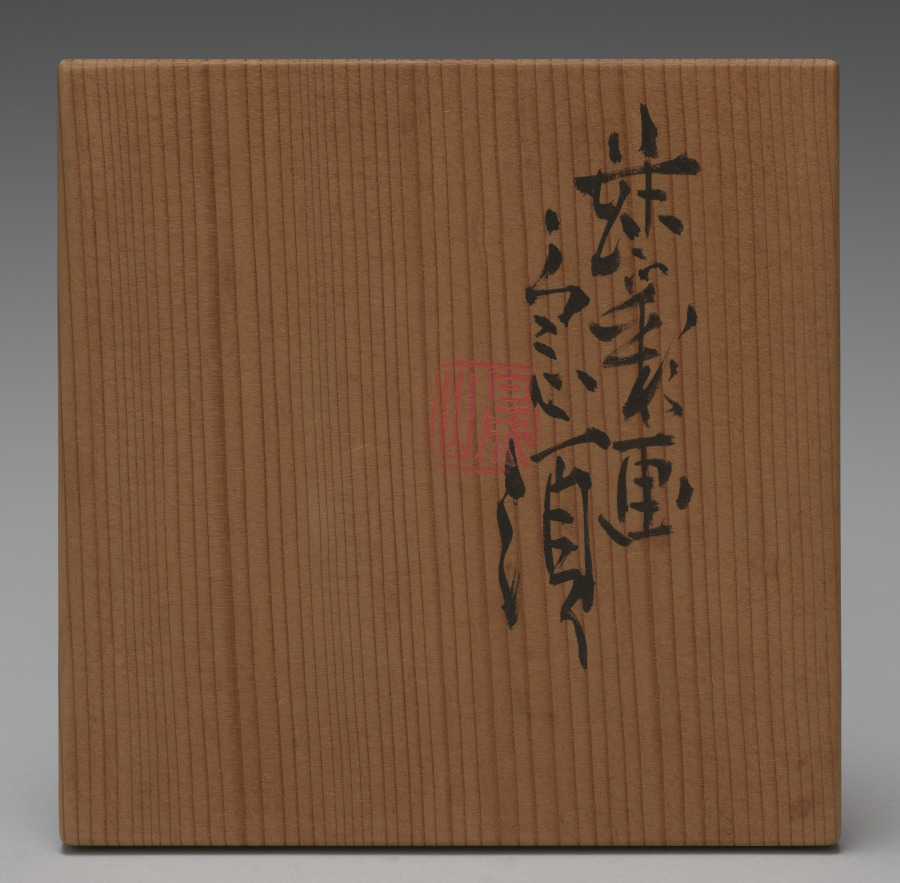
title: Teapot with Chrysanthemums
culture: Japan, Meiji period (1868–1912)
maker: Seifū Yohei III (Japanese, 1851–1914)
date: 1912–14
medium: Porcelian with overglaze enamel and gold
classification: Ceramic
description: This teapot with recessed lid has a bold, realistic design of pale yellow and white chrysanthemums rendered in overglaze color enamels and dotted gold centers. Black contour lines define the yellow and white flowers and their green stems and leaves. Small pink and purple chrysanthemums are rendered as simple motifs, their shapes defined in contrast to the white ground of the pot.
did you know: This side-handled teapot is designed for brewing and serving sencha.